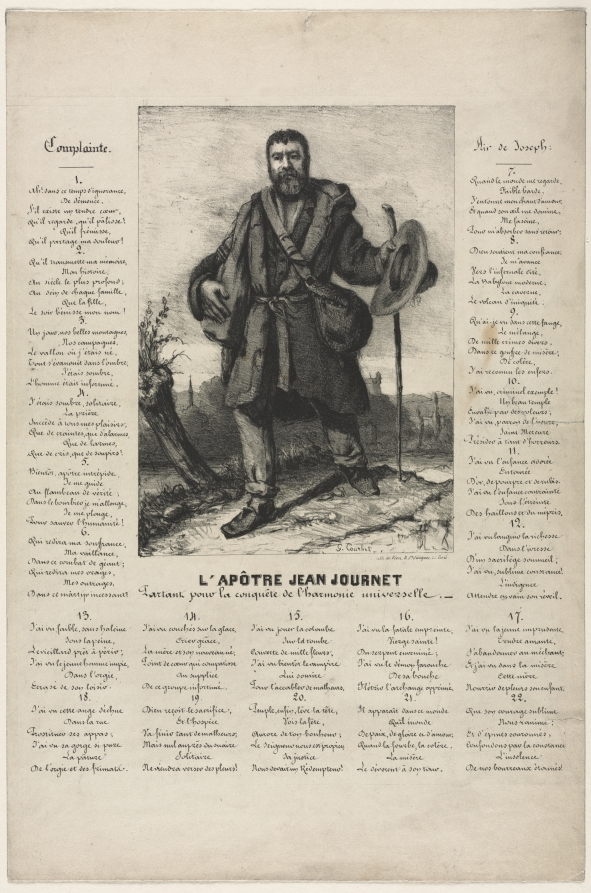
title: Jean Journet Departing for the Conquest of Universal Harmony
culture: France, 19th century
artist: Gustave Courbet (French, 1819–1877)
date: 1850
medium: lithograph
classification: Print